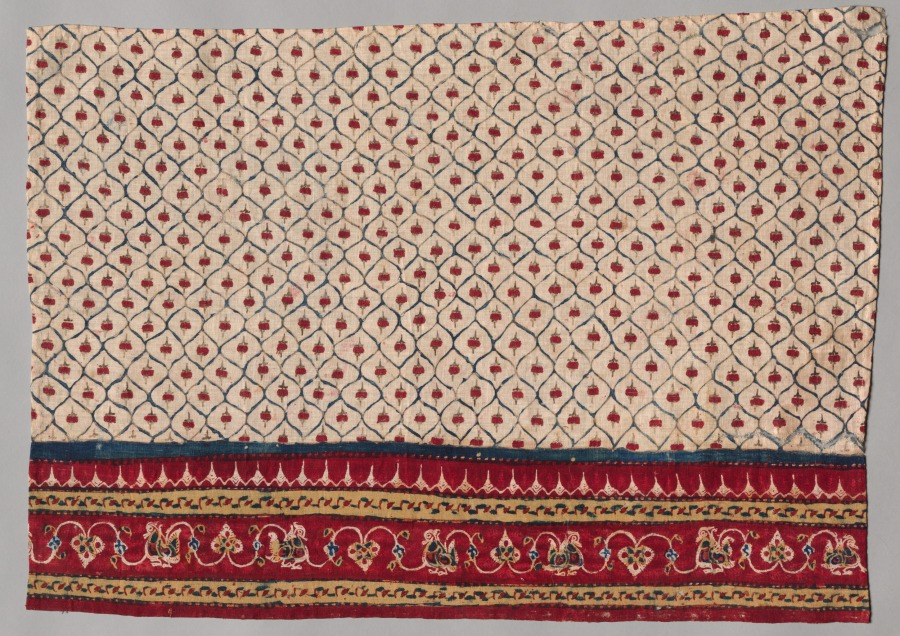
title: Fragment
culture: India, 19th century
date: 1800s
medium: resist printed cotton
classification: Textile